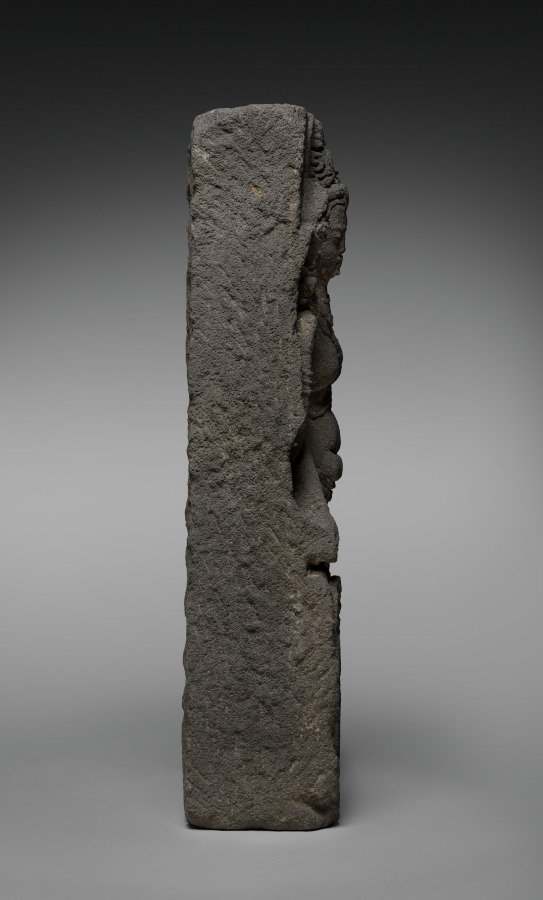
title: Goddess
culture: Indonesia, Central Java, Boyolali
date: 800s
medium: volcanic stone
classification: Sculpture